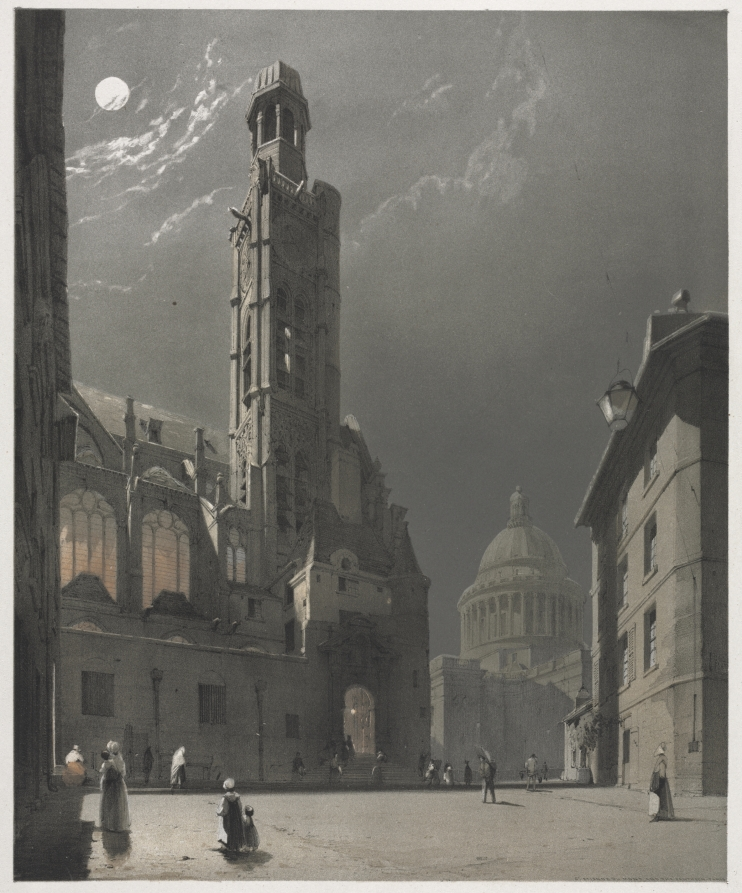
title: Picturesque Architecture in Paris, Ghent, Antwerp, Rouen: St. Etienne du Mont and the Pantheon, Paris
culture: England, 19th century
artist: Thomas Shotter Boys (British, 1803–1874)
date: 1839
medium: lithograph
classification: Portfolio